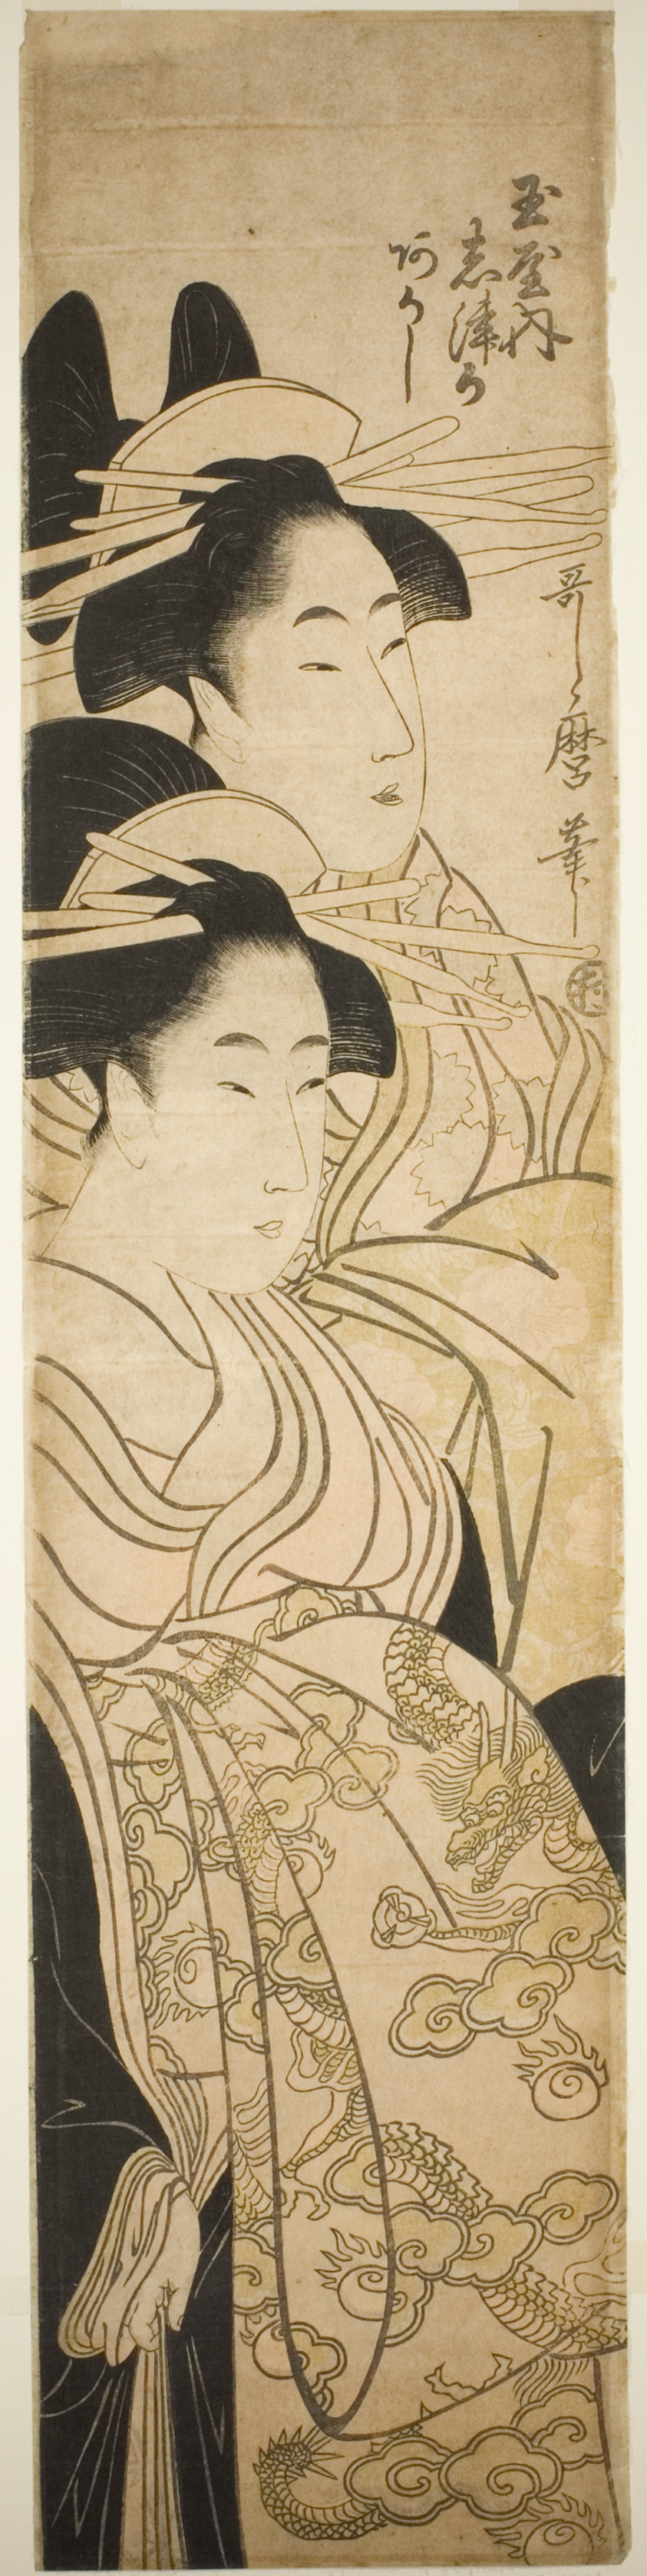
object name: Print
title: The Courtesans Shizuka and Akashi of the Tamaya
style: Japanese (culture or style)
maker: Kitagawa Utamaro 喜多川 歌麿; Japanese, 1753 (?)-1806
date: c. 1797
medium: Color woodblock print; hashira-e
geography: Japan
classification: woodblock print; print; asian art